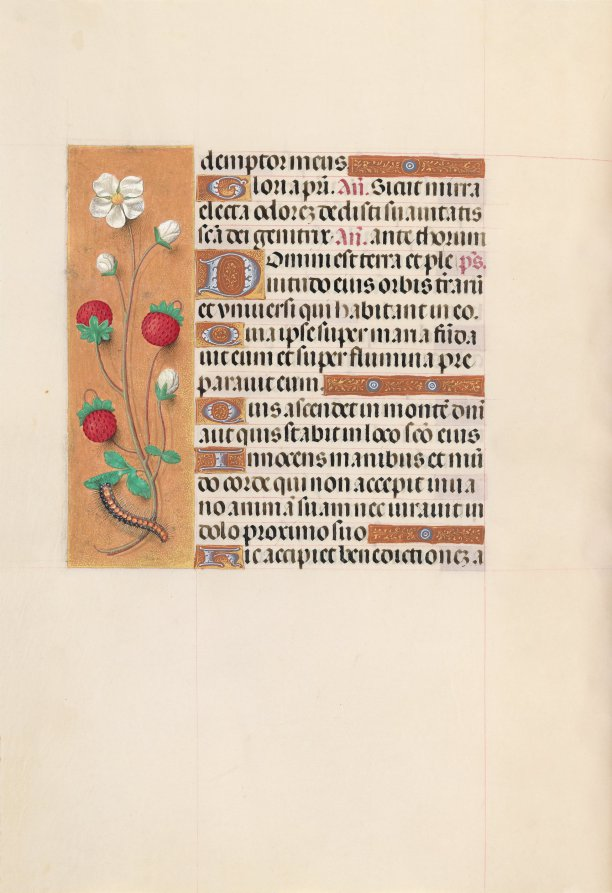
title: Hours of Queen Isabella the Catholic, Queen of Spain: Fol. 102v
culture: Flanders, Ghent and Bruges, late 15th century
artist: Master of the First Prayerbook of Maximillian (Flemish, c. 1444–1519)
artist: and Associates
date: c. 1500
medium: ink, tempera, and gold on vellum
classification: Bound Volume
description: This manuscript was illuminated by a circle of at least five highly organized manuscript painters active in the Flemish cities of Ghent and Bruges. The principal illuminator was Alexander Bening, who painted the majority of the book's miniatures. Manuscripts produced by this circle of artists are renowned for the decoration of their borders, which typically feature a rich variety of realistically-painted flowers, birds, and butterflies. This prayer book, called a book of hours, was intended not for a cleric, but for the private devotions of a lay person-in this case, Isabella the Catholic, Queen of Spain (1451-1504). Isabella's coat of arms embellishes the book's frontispiece. It is unlikely that the book was commissioned by the Queen herself; rather, she probably received it as a diplomatic gift from someone courting her patronage, perhaps Cardinal Francisco Jimenez de Cisneros. A Franciscan friar, Jimenez was dependent upon Isabella for his advancement, first to the post of Queen's confessor in 1492, and then to Archbishop of Toledo in 1495.